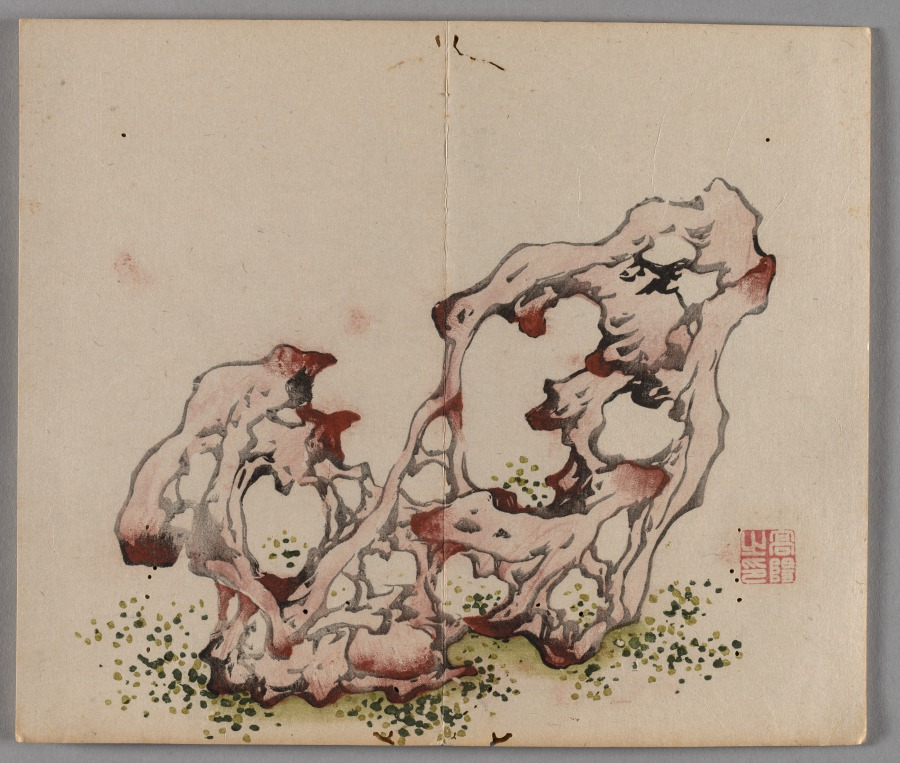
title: Ten Bamboo Studio Painting and Calligraphy Handbook (Shizhuzhai shuhua pu): Rocks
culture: China, Qing dynasty (1644-1911)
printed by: Hu Zhengyan (Chinese, c. 1584–1674)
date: 1633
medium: Woodblock-printed book; ink and colors on paper; first edition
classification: Print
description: Color printing reached a level of perfection in the early 1600s, as seen in this Ten Bamboo Studio Collection of Calligraphy and Painting and the Mustard Seed Garden Manual of Painting (printed 1679 and 1701). The painterly quality, precision in registering (aligning) the woodblocks, and harmonious colors made them the most successful color print editions in Chinese history. Both editions were printed and compiled in Nanjing, spread nationwide, and had a great impact on the arts in Japan and Korea.